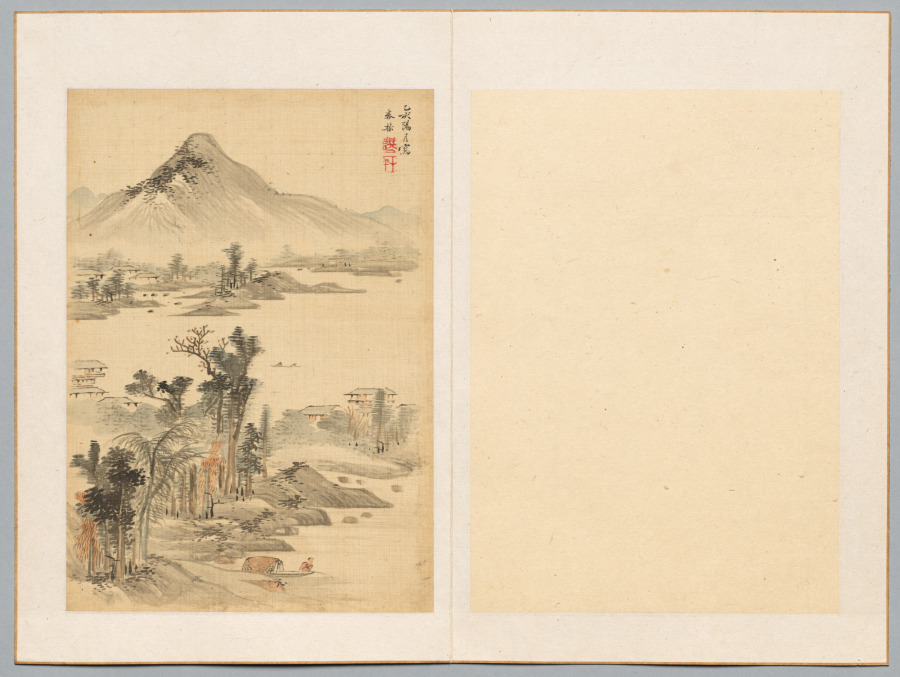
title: Landscape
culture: Japan, Edo period (1615–1868)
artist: Uragami Shunkin (Japanese, 1779–1846)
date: 1815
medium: leaf from a pair of folding albums; ink and light color on paper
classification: Portfolio